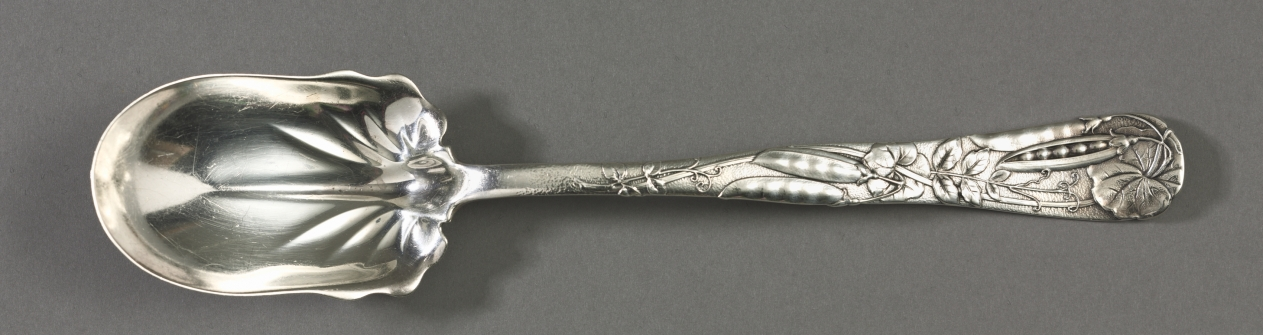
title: Vine Pattern Salad Spoon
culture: America, New York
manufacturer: Tiffany & Co. (America, New York, est. 1837)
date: c. 1872–80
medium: silver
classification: Silver